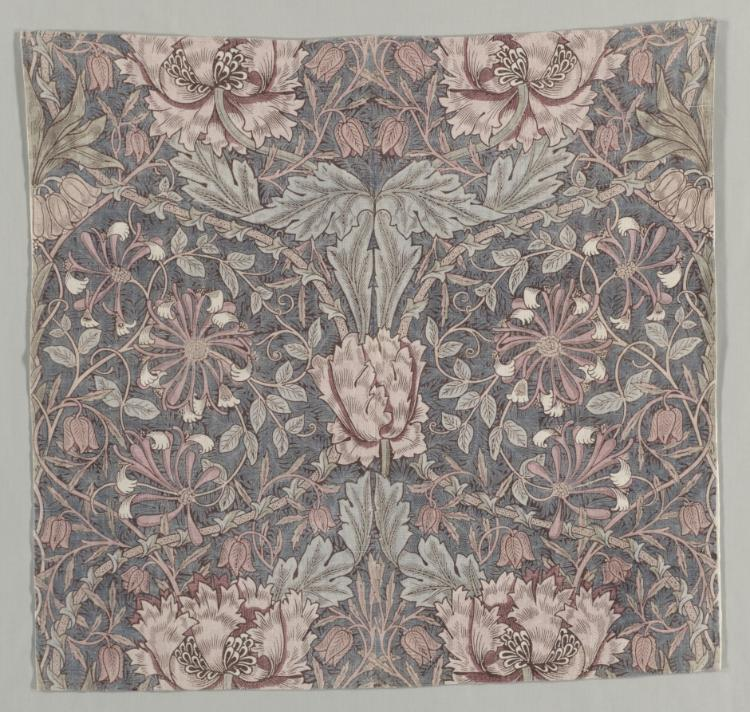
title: Honeysuckle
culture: England, Early 20th century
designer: William Morris (British, 1834–1896)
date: Early 20th century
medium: plain weave linen, printed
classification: Textile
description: William Morris’s daughter May called Honeysuckle “the most truly Morrisian in character of all his pattern-making . . . the most mysterious and poetic—the very symbol of a garden tangle.” Like many Morris textiles from this period, Honeysuckle has a mirrored pattern. At 29 3/4 inches high and 34 3/4 inches wide, this repeat was unusually broad, spanning almost the entire width of the loom. Morris believed that large patterns were more restful to the eye than small patterns, even when used to decorate modestly sized rooms. Designs from this period are a testament to the delight he took in his garden at Kelmscott Manor; he favored the charm of native English flowers above exotic specimens.